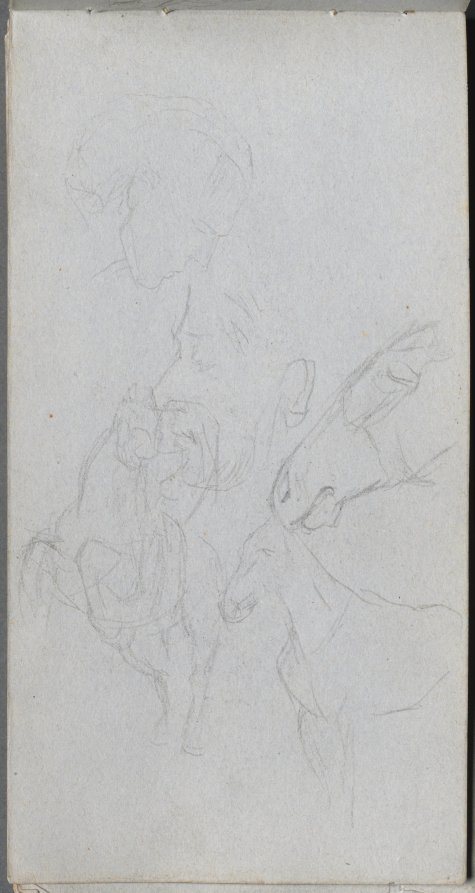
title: Sketchbook, page 90: Study of Horses, Profiles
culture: France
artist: Ernest Meissonier (French, 1815–1891)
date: c. 1860s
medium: graphite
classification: Bound Volume